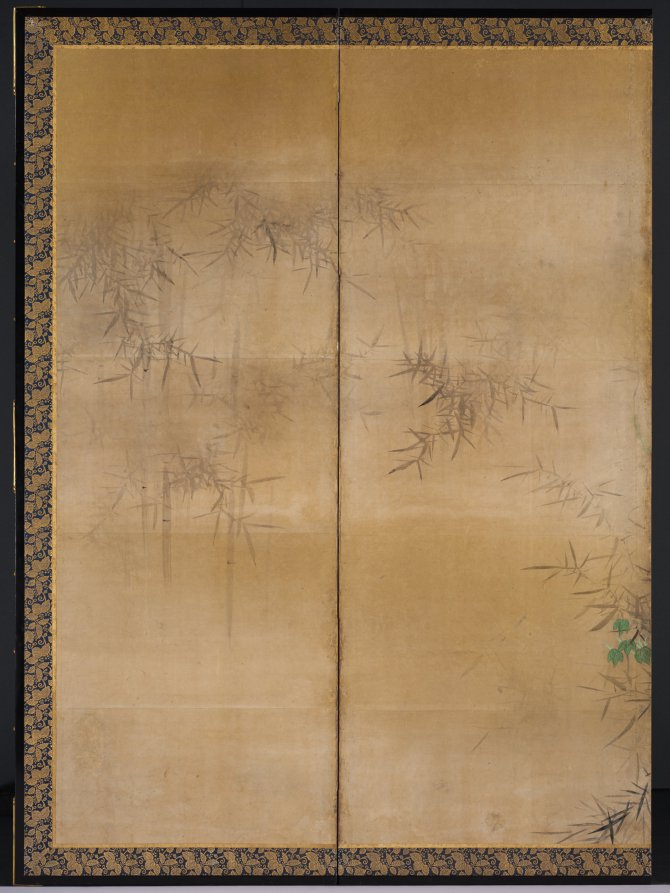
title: Winter and Summer Flowers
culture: Japan, Momoyama period (1573–1615)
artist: Kaihō Yūshō (Japanese, 1533–1615)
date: c. 1600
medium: One of a pair of six-panel folding screens; ink, color, and gold on paper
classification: Painting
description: White camellias bloom behind a large pine in the right screen and blue morning glories creep through bamboo in the left screen of this composition. The mountains and bridge suggest a continuous landscape, but the paintings actually juxtapose flowers of winter and summer, with time progressing from right to left. Kaihō Yūshō painted similar landscapes for Zen temples in Kyoto.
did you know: The pine and bamboo are defined by ink wash, but the flowers take form through color within contour lines.